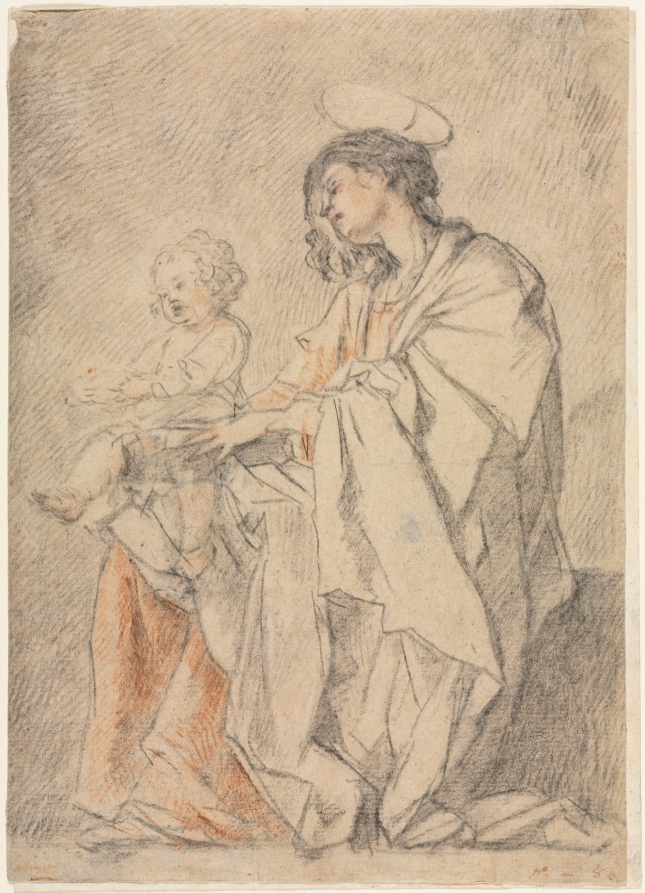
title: Virgin and Child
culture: France, 17th century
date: 1600s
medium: black and red chalk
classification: Drawing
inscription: lower left, in brown ink: la hyre ; lower right, in brown ink: no. - 8 ; VERSO, lower right, in graphite: #34 ; SECONDARY SUPPORT (now removed), upper left, in graphite: 86 [sideways] ; lower left, in graphite: Vincent [Romano?] ; lower left, in graphite: Nr. 51. ; lower left, in graphite?: [illegible, erased] ; lower center, in graphite: Laurentius de La Hire. / 1606-56. ; VERSO, center, in brown ink: V[illegible] Romano